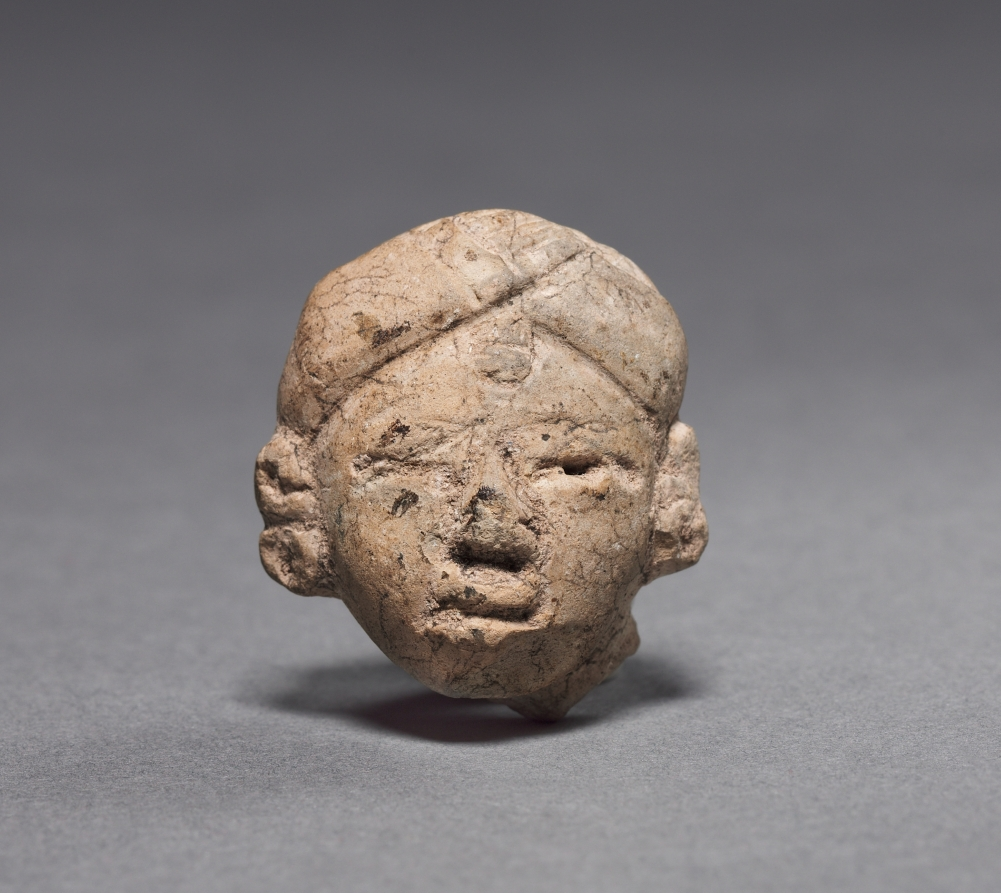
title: Figurine Head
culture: Mexico or Central America, Maya(?), Middle Preclassic period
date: c. 600–200 BCE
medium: pottery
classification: Sculpture